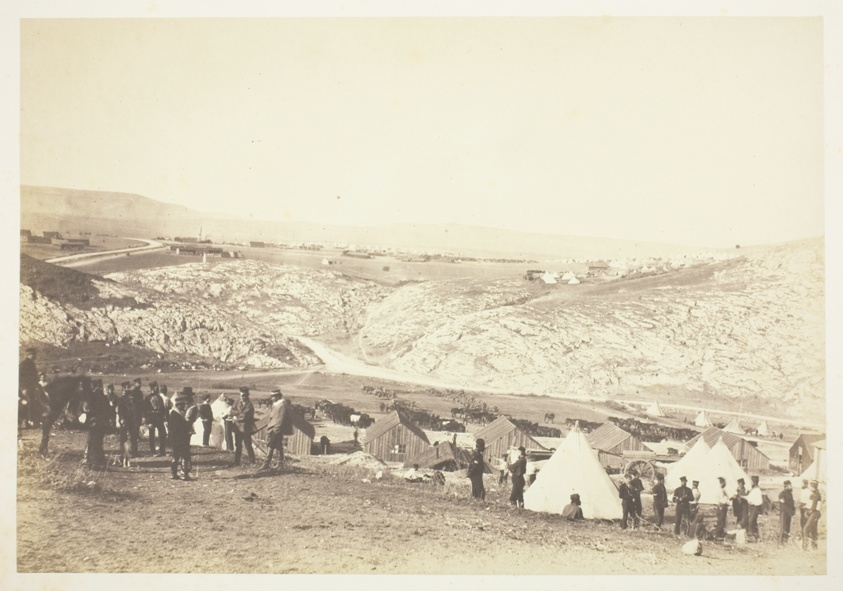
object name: Photograph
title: Encampment of Horse Artillery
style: 19th century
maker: Roger Fenton (English, 1819–1869)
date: 1855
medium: Salted paper print, from the album "Photographic Pictures of the Seat of War in the Crimea" (1856)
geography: England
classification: salted paper print; photographic process; photography; photograph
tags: Collected by Hugh Edwards, documentary